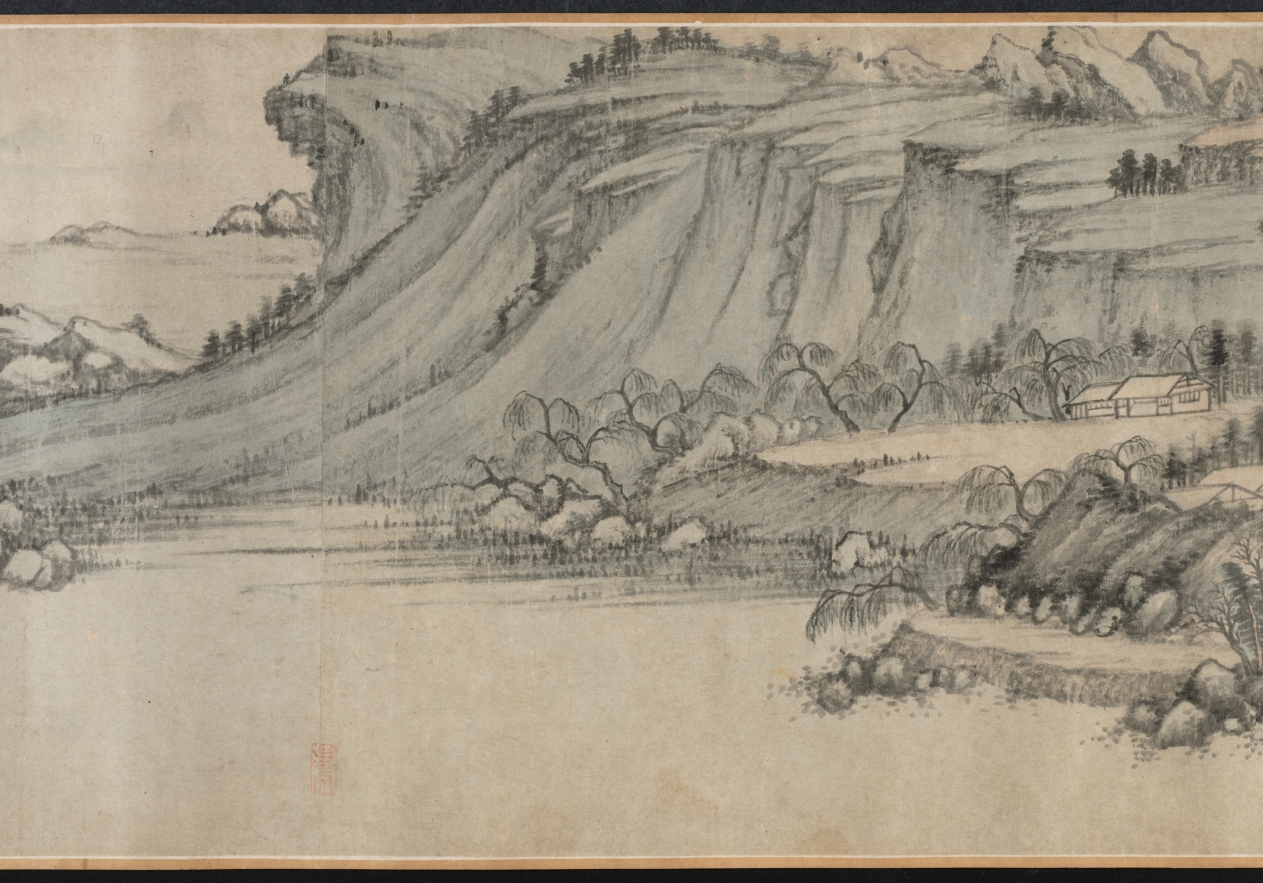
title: Mt. Taibo in the Style of Wang Meng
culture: China, Ming dynasty (1368–1644)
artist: Du Qiong (Chinese, 1396–1474)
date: 1442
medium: handscroll; ink and light color on paper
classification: Painting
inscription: Artist's inscription, signature, and 11 seals: [1 seal] Tung-yüan chai. Huang-ho-shan-ch'iao [Wang Meng] painted a painted called T'ai-po Mountain. Its brushwork is superior and admirable, which is very close to Yu-ch'en [Wang Wei, 699-759]. The cleverness of its composition, the maple groves and rustic temples, the inaccessible ravines and autumnal plateaus, the periolous peaks and strange rocks, etc., all seem to be so natural. The paper is only a little over eight feet, but the landscape has the range of a thousand miles. Once you open and note the contents, it is as if one were roaming among the mountain peaks enveloped in mist and clouds, and forgot the dusty world. When I first saw this, I was so mixed with excitement and joy that I could not take my hands off the painting. So I put it on the table, and tried my best to imitate it, forgetting sleeping and eating for about three months before it was completed. Although I do not dare to tread in the footsteps of Huang-ho shan ch'iao, I took great pains to capture his spirit in composition and colors. I do not know whether it would pass the judgment of the experts. On the fifteenth day of the fifth month, the seventh year of the Cheng-t'ung year [1442], inscribed by Tung-yüan, Tu Chiung. [2 seals] Yung-chia; Ching-chieh ming-men. [8 seals on painting] Tung-yüan chai; Ching-chieh ming-men; Yung-chia; Tu Ch'iung yin; Tung-yüan (repeated 5 times). trans. WKH/LYSL 3 colophons and 7 additional seals: 1 colophon and 2 seals of Chou Ting (1401-1487); 1 colophon and 2 seals of Wu K'uan (1435-1504); 1 colophon, dated 1655, and 2 seals of Lan Ying (1585-after 1664).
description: When a Chinese painter "imitated" a painting by a past master, the intention was never to produce an exact copy. Du Qiong, the Ming painter from Suzhou, is a case in point. The painting style of this handscroll is actually closer to that of Huang Gongwang (1269–1354) than to the style of Wang Meng (about 1301–1385). Both masters were active during the previous dynasty and are among the so-called Four Great Masters of the Yuan dynasty (1279–1368). In this painting, the interplay of styles, including Du Qiong's own, contribute to an inner dimension that is more than visual. Mt. Taibo is located in the province of Zhejiang and is known for its scenic beauty. In this scroll, however, it is not depicted literally. The image is an ideal representation of mountains in southeastern China.